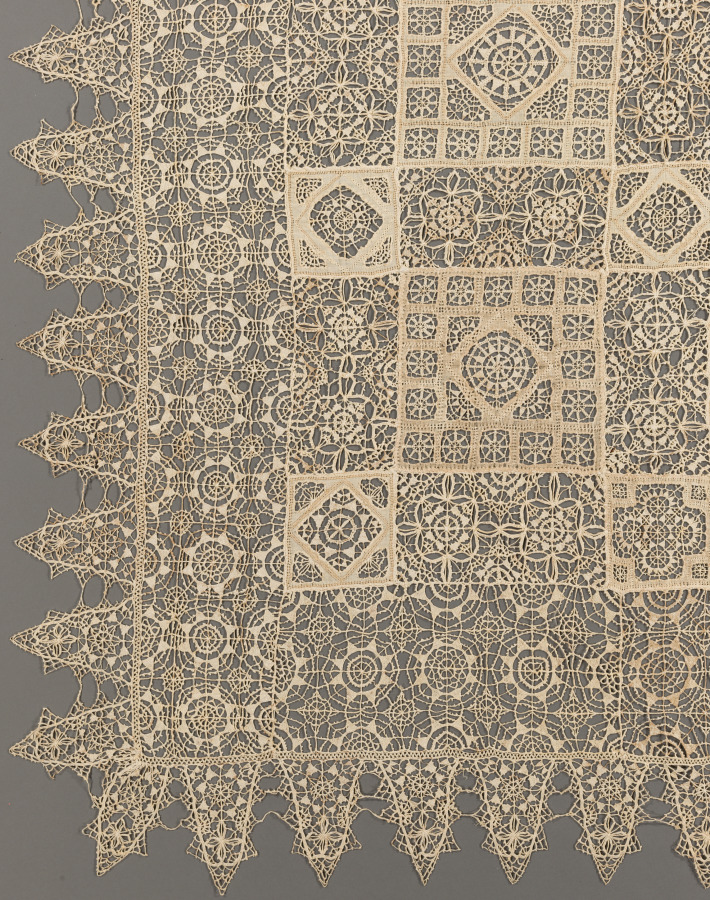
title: Lace Cloth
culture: Italy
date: 1560–1600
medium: Linen; needle lace (cutwork and reticella)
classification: Lace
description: Consisting of more than 80 squares of cutwork (a cut and embellished linen ground) and rectangles of reticella (needle lace), this luxurious cover could have been made by a single person or several people who divided the work. Close looking reveals that the cloth is made with threads of two very slightly different colors: bleached and unbleached linen. Together the sections resemble snowflakes, which are of similar shape and size but vary subtly from one another. The perplexing dark stitches in the upper left corner do not repair damage, and might be the maker’s signature.